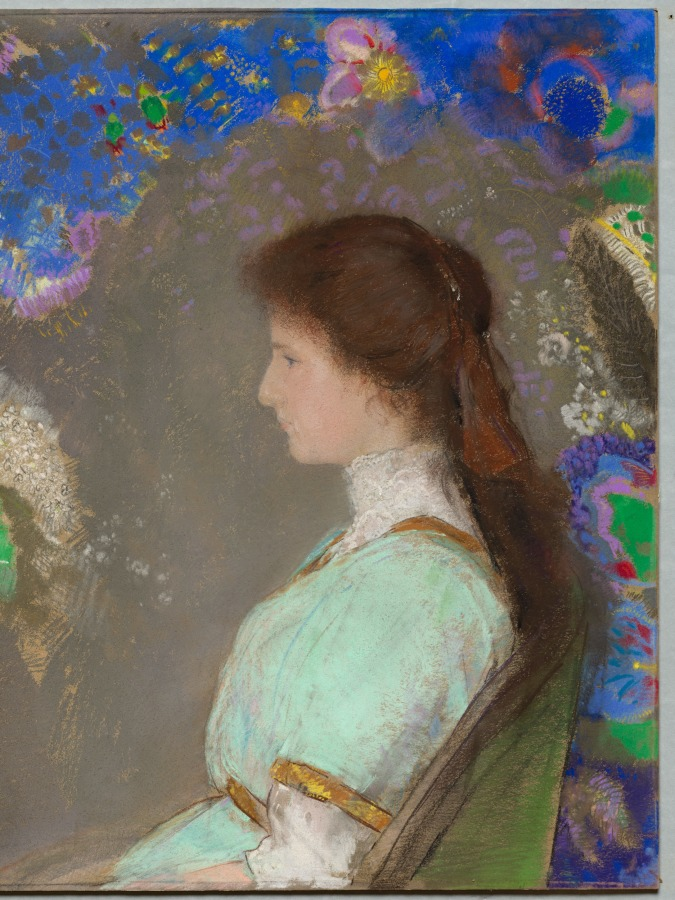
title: Violette Heymann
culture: France, early 20th Century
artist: Odilon Redon (French, 1840–1916)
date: 1910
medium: pastel on gray wove paper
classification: Drawing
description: Although he was known early in his career for works primarily in black and white, such as charcoal drawings and lithographs, Odilon Redon turned to more colorful media, including pastel, later on. In particular, he focused on commissioned pastel portraits of women with flowers, such as this one. Here, the young niece of the Parisian collector Marcel Kapferer appears alongside colorful blossoms as she looks forward, focused as if in the dreamlike state evoked by her surroundings.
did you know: This pastel was acquired by the Cleveland Museum of Art in the same year as several other works by Redon, leading arts writers to describe Cleveland as holding the most important works by the artist outside of Paris at the time.